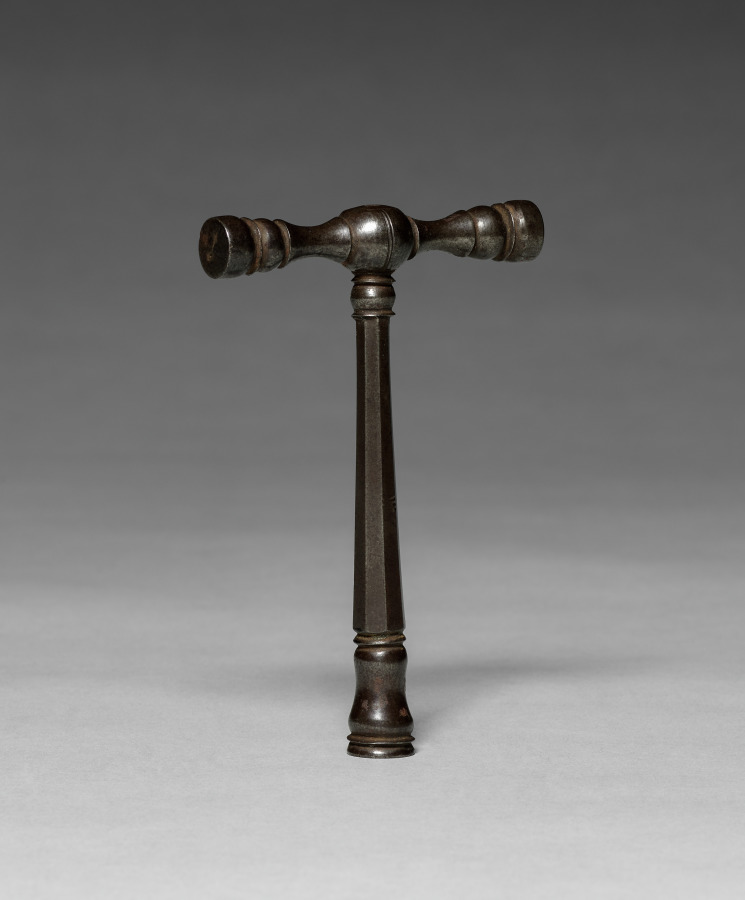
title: Key Wrench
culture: Europe, 18th century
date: 1700s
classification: Tool